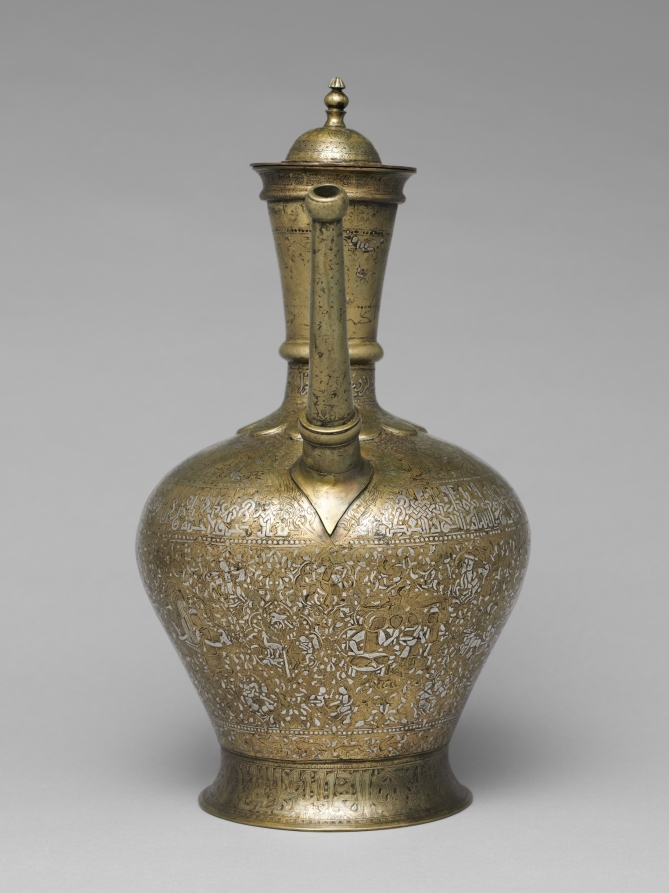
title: Luxury Ewer Extending Good Fortune to the Owner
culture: Iraq, possibly Mosul, Zangid or Artugid Period, 13th Century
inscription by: Ahmad al-Dhaki al-Mawsili (Iraqi, Mosul, active early 1200s?)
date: 1223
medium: brass inlaid with silver; lid and base added later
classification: Metalwork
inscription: Band on the neck (naskh): "Work of Ahmad al-Thaki, the engraver, al-Mawsili, in the year 620 and glory to my owner"; band at the base of the handle (naskh): "Work of Ahmad al-Thaki al-Mawsili"; graffiti of later owners, roughly scratched into the neck of the ewer: "Husayn ibn Qasim"; "Usta al-Muhtasib [?]"; band on the shoulder of the ewer (plaited, animated kufic): "Good luck, and learning, and commanding respect, and prosperity, and pride, and generosity, and faithfulness, and affection, and glory, and survival, and justice, and blessings, and exaltedness, and prosperity, and everlasting peace, and charitable giving."; band on the foot (naskh) [foot is a later addition]; this inscription has not yet been deciphered.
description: This silver inlaid ewer was produced for luxury clientele. The wide band around the body of the vessel displays vignettes of daily and courtly life contained within multilobed medallions. Some of the scenes feature falconry, hunting, dancing, and several groups of musicians. All these scenes are set off against a skillfully executed arabesque background—a pervasive motif in Islamic art characterized by interwoven vegetal and curvilinear elements. An inscription around the ewer’s shoulder extends good fortune, prosperity, and peace to the owner. The ewer is dated 1223 and signed by the master craftsman Ahmad al-Dhaki of Mosul.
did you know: Later owners roughly scratched their names into the neck of the ewer.